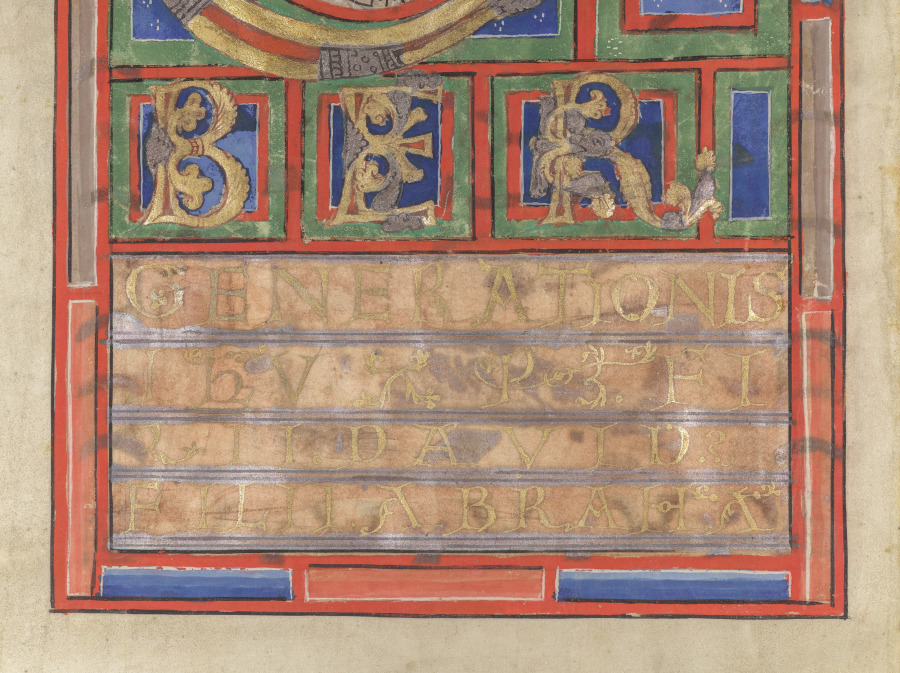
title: Single Leaf Excised from a Gospel Book with Initial L[iber generationis]: St. Matthew (verso)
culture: Germany, Helmarshausen Abbey, 12th century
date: c. 1190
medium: ink, tempera, silver, and gold on vellum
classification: Manuscript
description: This leaf comes from a volume that is preserved in the Trier Cathedral Library in Germany (Codex 142).